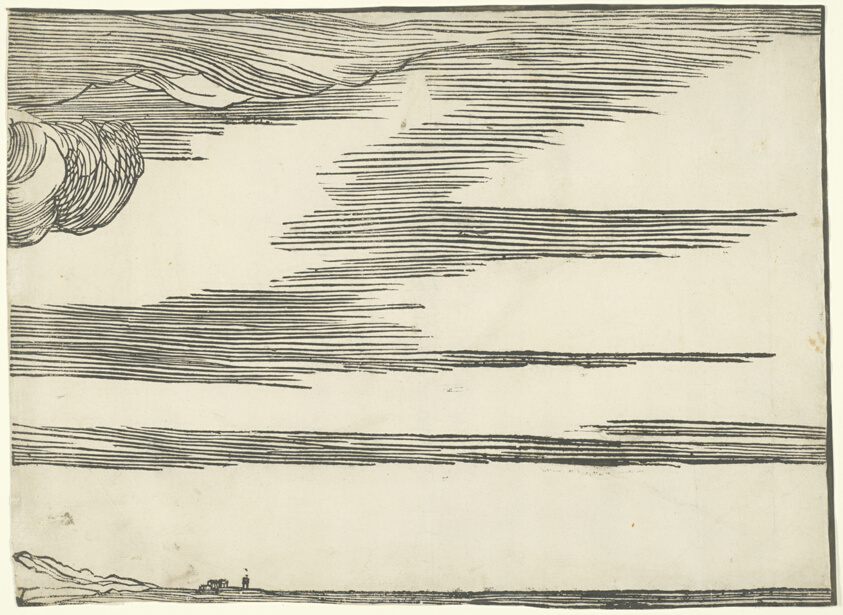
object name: Print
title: The Submersion of Pharaoh's Army in the Red Sea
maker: After Titian (Italian, c. 1488-1576); published by Domenico dalle Greche (Italian, active 1543-1558)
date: c. 1515, printed 1549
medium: Woodcut in black on ivory laid paper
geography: Italy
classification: woodcut; print; prints and drawing